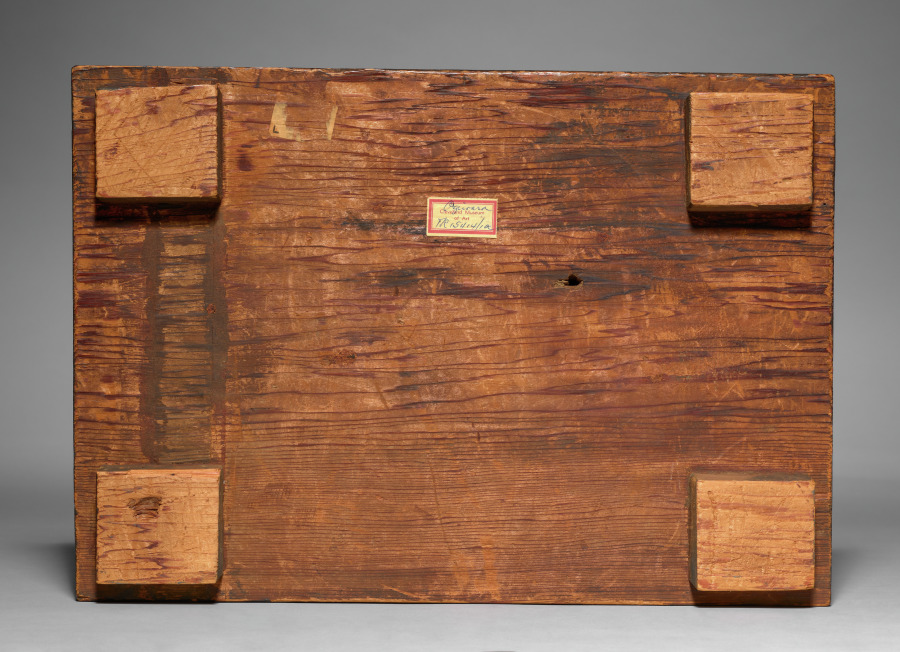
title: Guardian Figure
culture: Japan, Heian period (794–1185)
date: 1000s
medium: wood with polychromy and kirikane (cut-gold)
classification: Sculpture